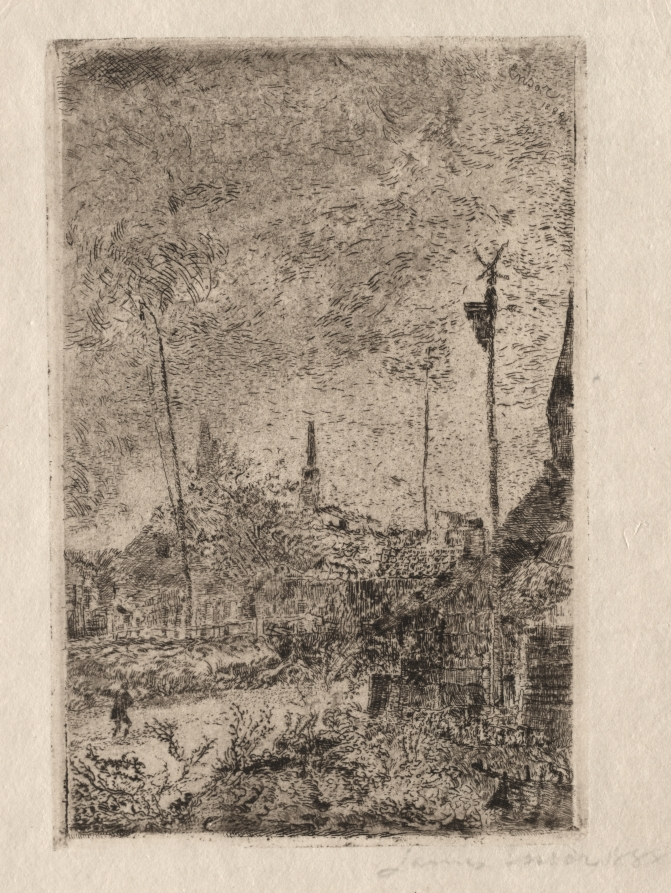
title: Cottages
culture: Belgium, 19th century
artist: James Ensor (Belgian, 1860–1949)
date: 1888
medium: etching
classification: Print